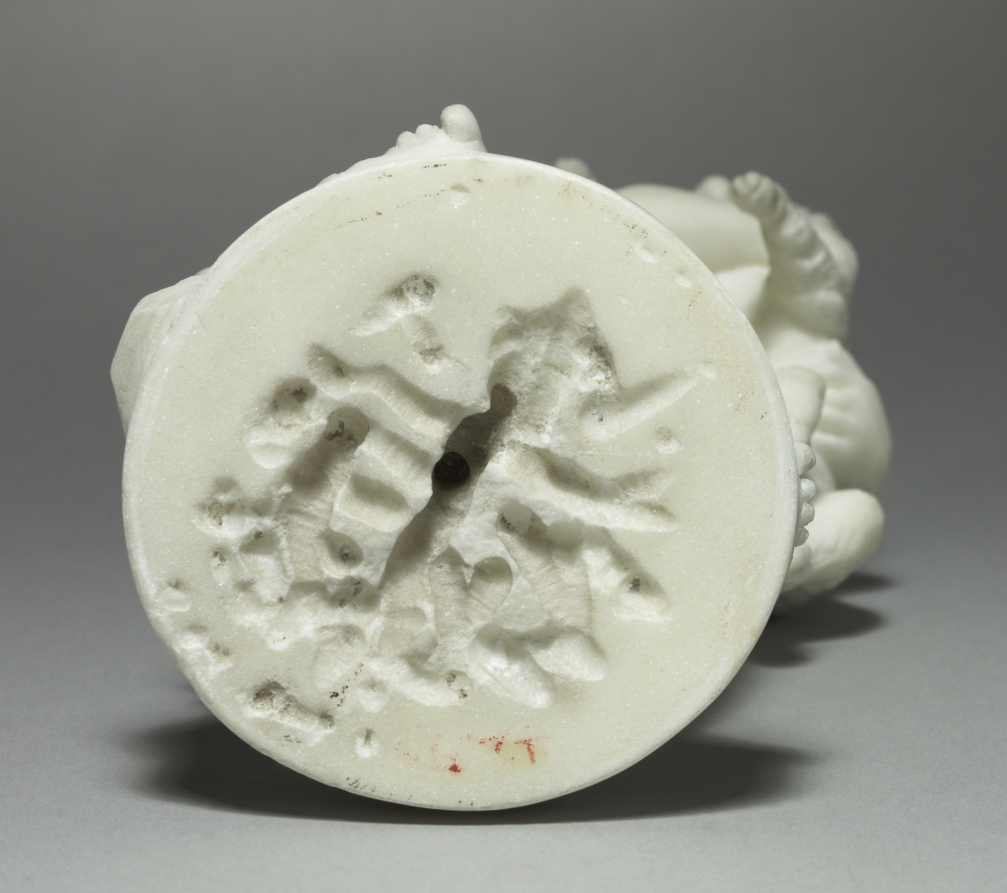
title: Faithful Love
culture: France, 19th century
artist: after Augustin Pajou (French, 1730–1809)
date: 1800s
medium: marble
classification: Sculpture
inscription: signature behind stump with roses: Pajou f(ecit) 1787.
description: These statuettes represent the opposing spectrums of love—fickle and faithful—both portrayed by Cupid. Fickle Love absent-mindedly plays with a butterfly, a symbol of the fleeting moment. Conversely, Faithful Love is accompanied by a dog, the ultimate loyal companion. These works were originally believed to be by the hand of Augustin Pajou, because the works are signed and he made nearly identical sculptures. However, due to the slightly clumsy execution and the awkward scale of the signatures, the museum now believes the statuettes were created by another artist after Pajou's design.